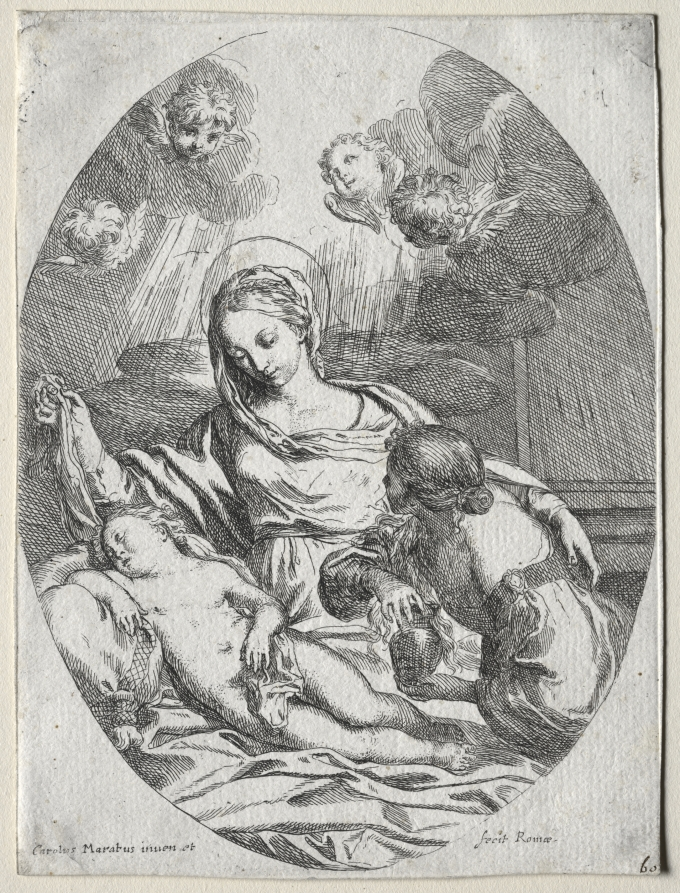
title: Madonna and Child with the Magdalen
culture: Italy, 17th century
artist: Carlo Maratti (Italian, 1625–1713)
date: c. mid-1600s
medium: etching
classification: Print